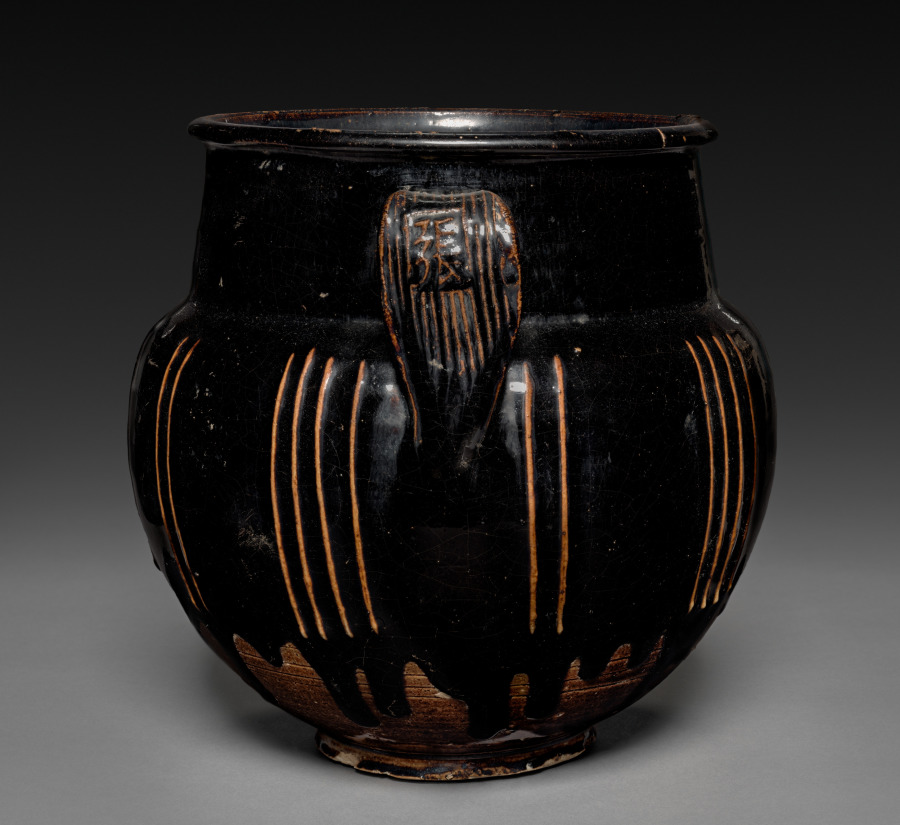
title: Jar with Handles and Vertical Ribs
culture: China, Yuan dynasty (1271-1368)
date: 1271–1368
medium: Glazed stoneware, Cizhou ware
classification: Ceramic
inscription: 張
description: Cizhou ware of the Yuan period with surviving handles is extremely rare and important. This ribbed jar has the characteristic dark brown or black glaze.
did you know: Each handle is molded with the character zhang 張.